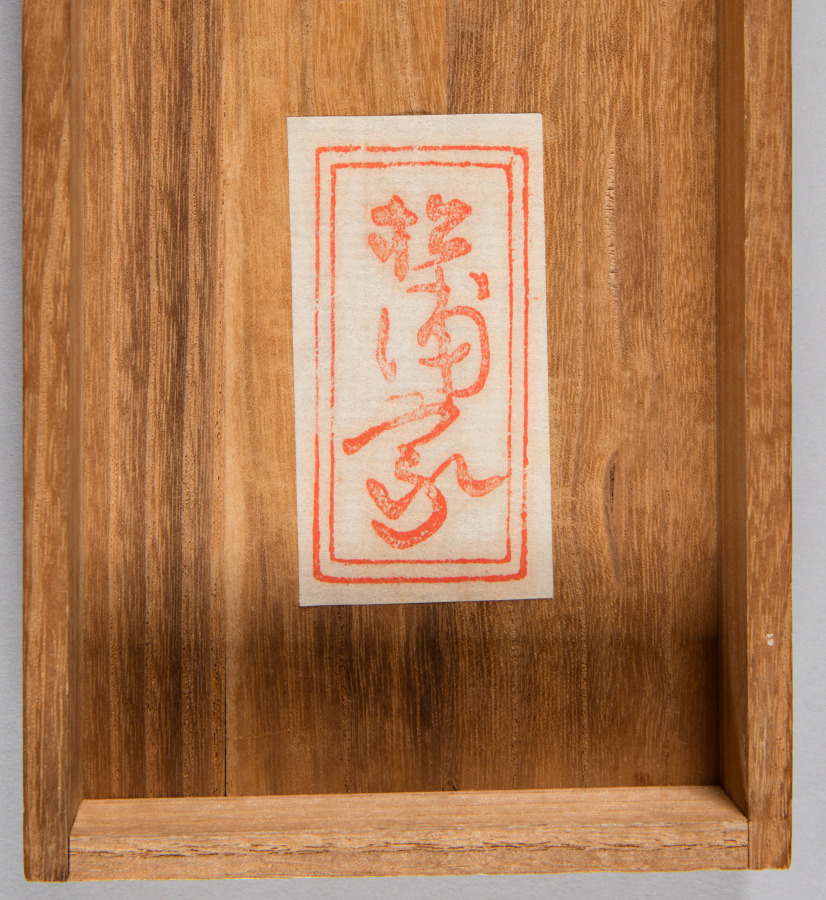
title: Reeds and Geese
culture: Japan, Kamakura period (1185–1333)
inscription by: Yishan Yining [Issan Ichinei] (Chinese, 1247–1317)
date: 1314–17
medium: hanging scroll; ink on paper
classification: Painting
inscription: signed: Issan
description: Reeds and geese has been a common pairing in Chinese literary and visual culture for many centuries. This painting presents the contribution of a Japanese amateur painter, almost certainly a Zen Buddhist monk, to Japan’s fledgling efforts to add the theme to its own cultural vocabulary in the early 1300s. As was customary at the time in Japan, the painter did not sign or seal his work; the inscription, a poem added to the painting by the eminent émigré monk Yishan Yining, along with his signature and seal, was of far greater cultural value. Today, the modestly sized painting has tremendous significance as one of the earliest surviving examples of Japanese ink paintings with reeds and geese.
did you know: Tokyo National Museum owns a copy of this painting made by Kano Gyokusen (1796–1864) when he was 14 years old.